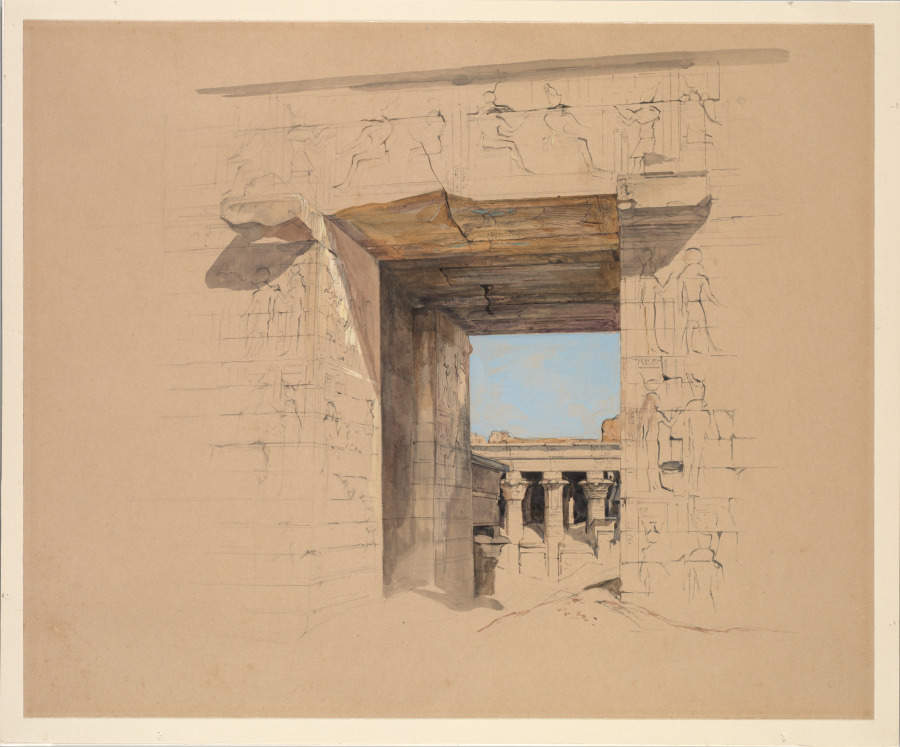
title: The Temple of Edfu: The Door of the Pylon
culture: England, 19th century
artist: John Frederick Lewis (British, 1805–1876)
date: 1850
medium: Watercolor (wash and point of brush work) and gouache and graphite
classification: Drawing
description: This notable recent acquisition is the work of John Frederick Lewis, who moved to Cairo in 1841 and stayed for almost a decade. He made this drawing on an expedition up the Nile that he took with his wife in 1849–50, around the same time that the first photographers arrived in Egypt. At that time,the temple complex at Edfu was buried to a depth of almost 40 feet. Lewis’s watercolor carefully renders the ruins and records the hieroglyphic inscription,but transcends archaeological description to evoke the thrill of exploration and discovery.Photographers,influenced by painters such as David Roberts and Lewis, often chose similar viewpoints and framing for their depictions.